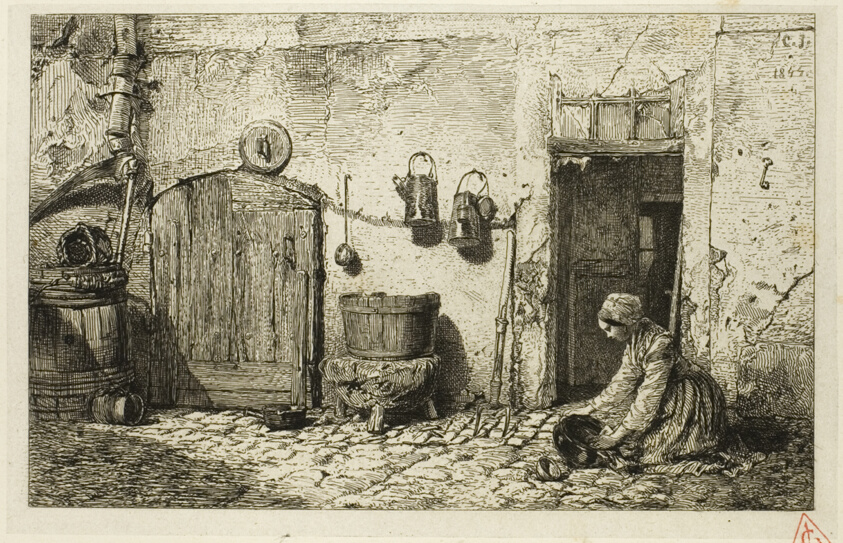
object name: Print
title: Scullery Maid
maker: Charles Émile Jacque (French, 1813-1894)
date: 1844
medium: Etching on light gray China paper laid down on ivory wove paper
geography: France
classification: etching; print; prints and drawing